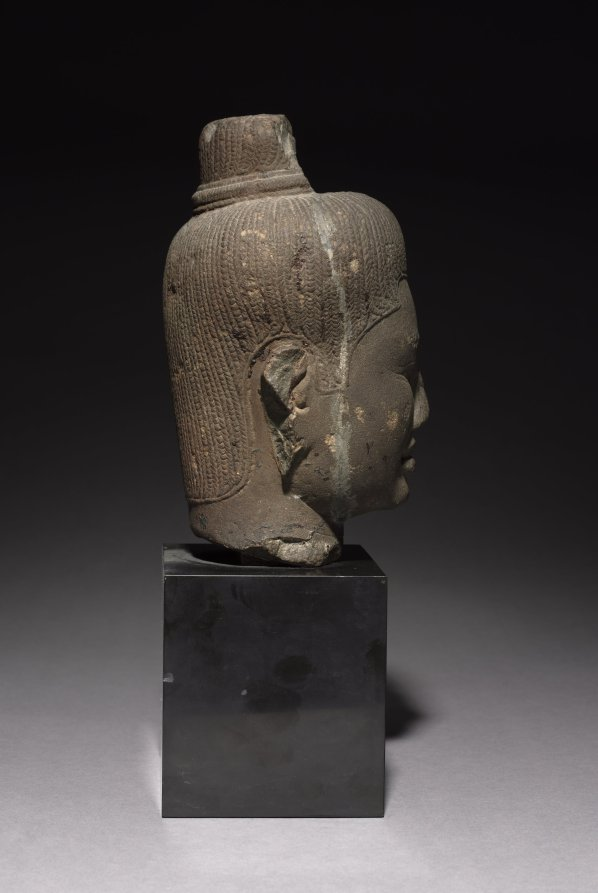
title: Head of a Follower of Shiva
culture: Cambodia, Angkor, 10th century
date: 900s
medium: sandstone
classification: Sculpture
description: Khmer patrons and artists produced works of art that could depict either a deified king or a god who has royal attributes. The Khmer cult of the god-king allowed for such fluidity of interpretation. Presence of a third eye in the forehead and matted locks of hair are attributes both of the Hindu god Shiva and the followers who emulated him in order to get closer to him.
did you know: The third eye on the forehead is a symbol of enlightenment.